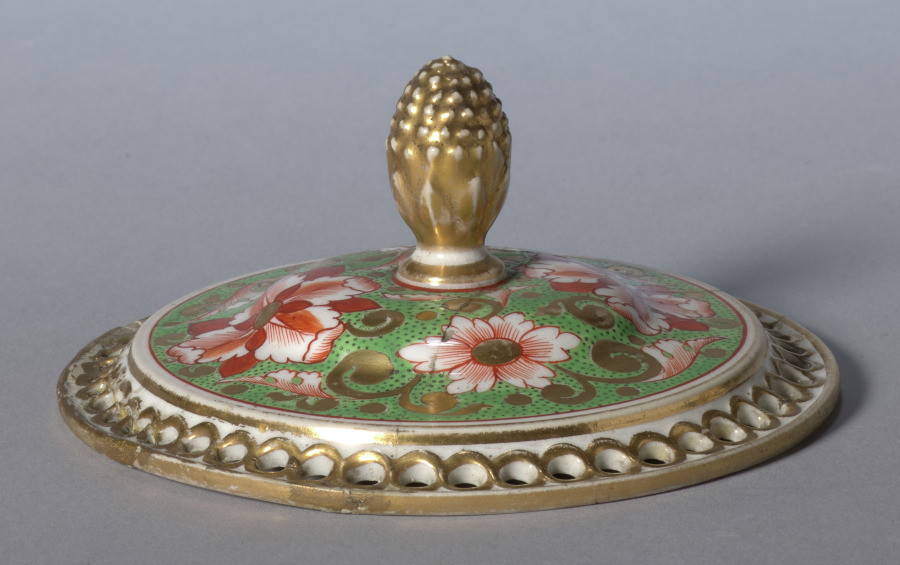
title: Cover for a Potpourri Vase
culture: England, Derby, 19th century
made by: Derby (Crown Derby Period) (British)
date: c. 1810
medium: porcelain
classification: Ceramic